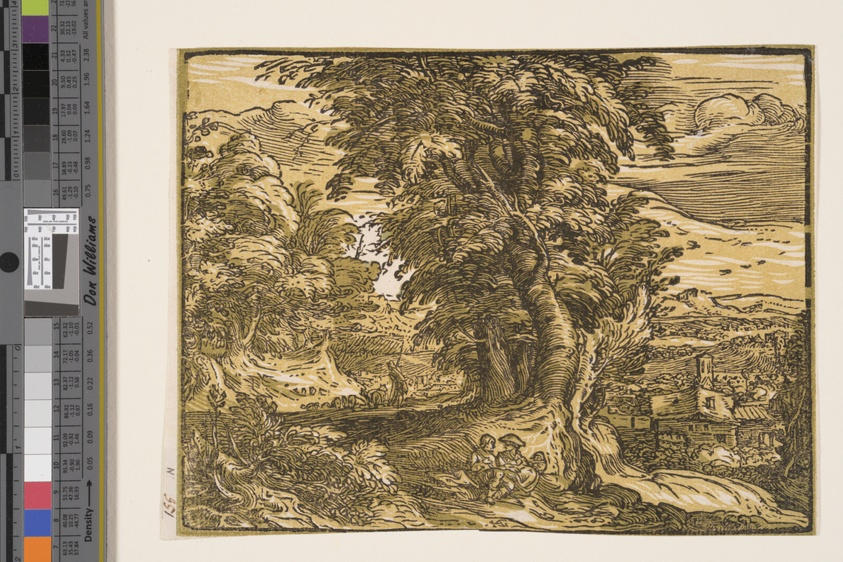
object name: Print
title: Landscape with a Shepherd Couple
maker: Hendrick Goltzius (Dutch, 1558–1617)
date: c. 1600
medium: Chiaroscuro woodcut from three blocks printed in green on ivory laid paper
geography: Netherlands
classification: woodcut; paper; print; prints and drawing